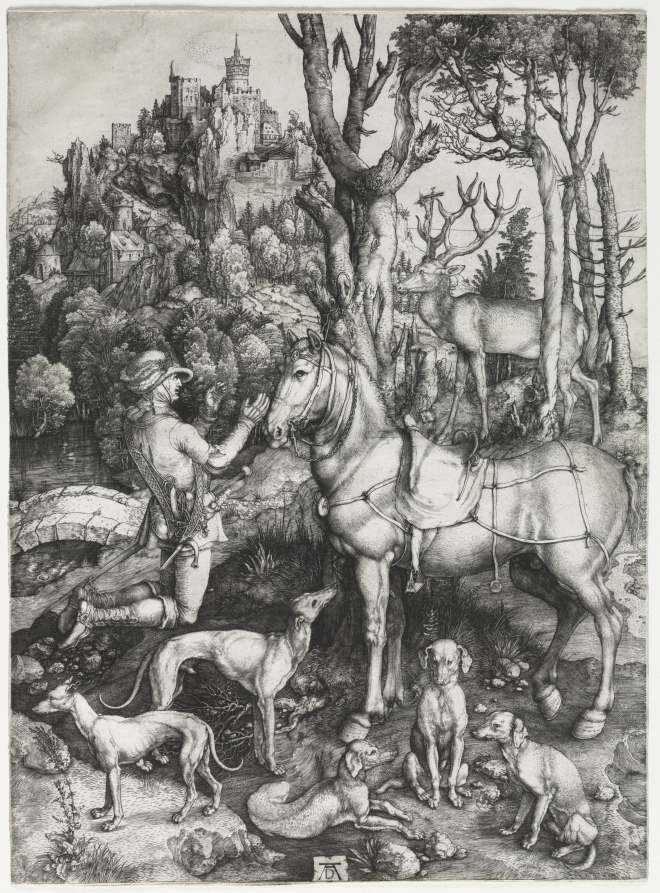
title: Saint Eustace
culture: Germany, late 15th-early 16th Century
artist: Albrecht Dürer (German, 1471–1528)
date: c. 1501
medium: engraving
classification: Print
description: Here, an encounter with nature dramatically alters a man’s journey through life. After Roman general Placidas tracked a stag in the forest, he saw a miraculous apparition of a crucifix between its horns. The miracle resulted in the general’s (thereafter Saint Eustace) immediate conversion to Christianity. Albrecht Dürer’s largest engraving demonstrates his mastery of tonal values and textures. His intense interest in nature’s variety makes finding the crucifix a kind of treasure hunt. Dürer took particular interest in the hunting dogs by carefully posing them to show five different aspects of the canine figure.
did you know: The artist showed an interest in how bodies move in space by depicting a hunting dog five times from different angles.